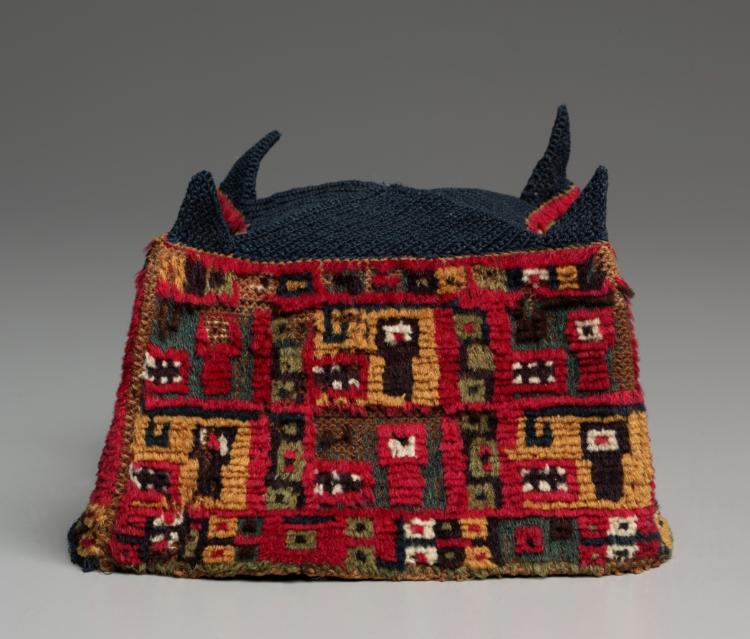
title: Four-Cornered Hat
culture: Peru, South Coast, Wari Culture, Tiwanaku Style, Middle Horizon, 8th-12th Century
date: c. 700–1100 A.D.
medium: needle network with and without cut pile: cotton and wool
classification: Textile